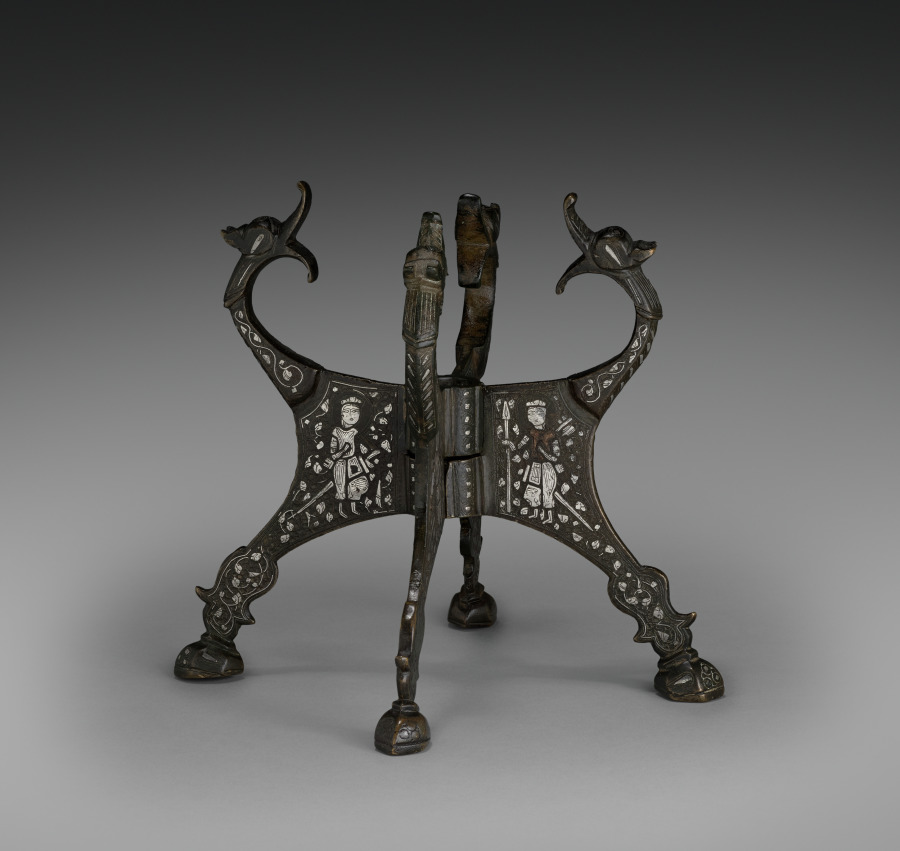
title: Dragon-headed Stand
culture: Northern Iraq or Syria, Zangid (1127–1251) or Ayyubid period (1171–1260)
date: 1200s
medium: cast brass inlaid with silver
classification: Metalwork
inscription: None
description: Themes of hunting and combat are evoked by this stand with gaping dragon heads and figures armed with swords and spears.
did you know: The four-legged stand has two interlocking parts.